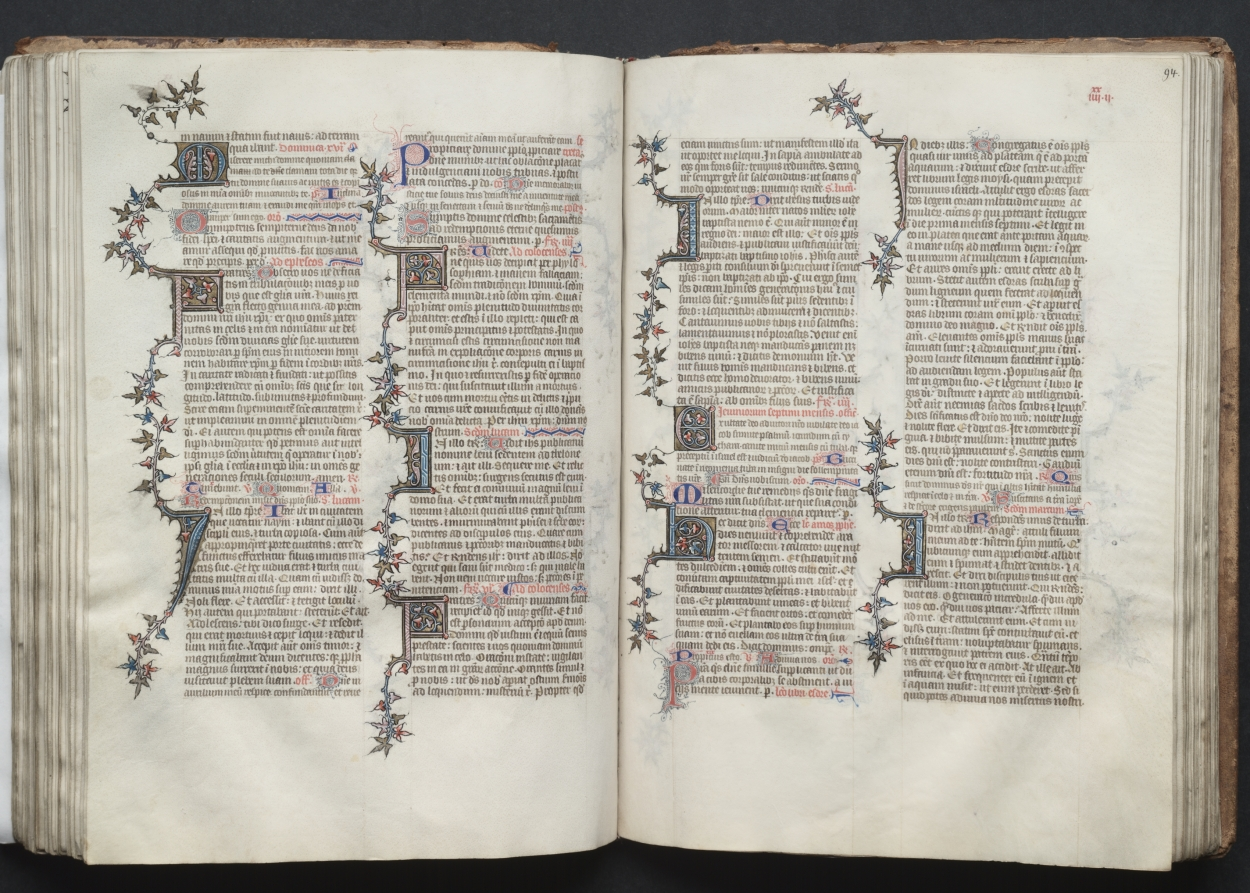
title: The Gotha Missal: Fol. 94r, Text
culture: France, Paris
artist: Master of the Boqueteaux (French)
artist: and Workshop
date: c. 1375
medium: ink, tempera, and gold on vellum; blind-tooled leather binding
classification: Bound Volume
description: The style and quality of this manuscript's decoration is typical of deluxe Parisian books made for aristocratic or royal patrons. Most of the book's decoration appears to be the work of the Master of the Boqueteaux, an artist active at the court of King Charles V (died 1380). His style was apparently shared by a number of book illuminators working in and around Paris. It is very possible that the Gotha Missal belonged to Charles V, but is not provable because the manuscript has no royal portraits and lacks a colophon. Given the book's magnificent decoration, however, it would seem that it was produced for a Valois prince, if not for the king himself. The manuscript receives its name from the German dukes of Gotha, its later owners.